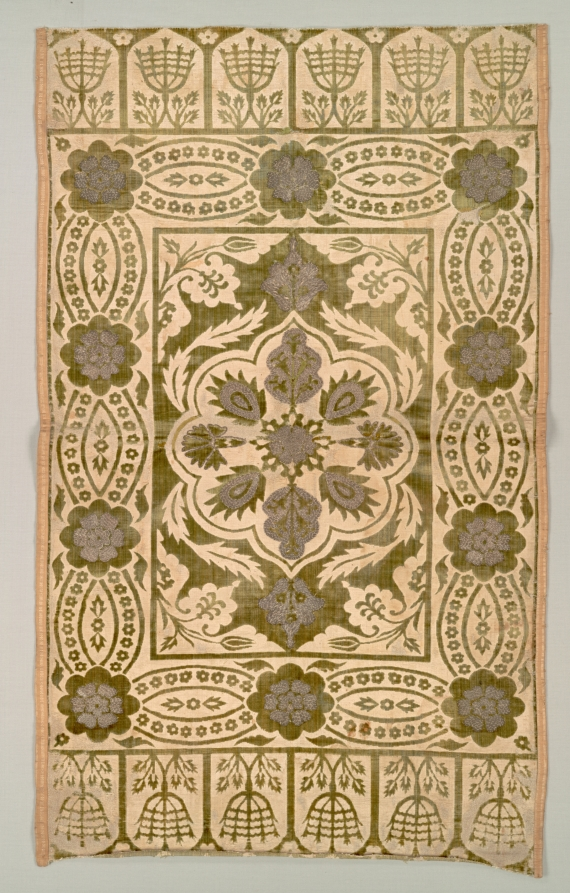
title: Velvet cushion cover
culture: Turkey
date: 1600s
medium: velvet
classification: Velvet